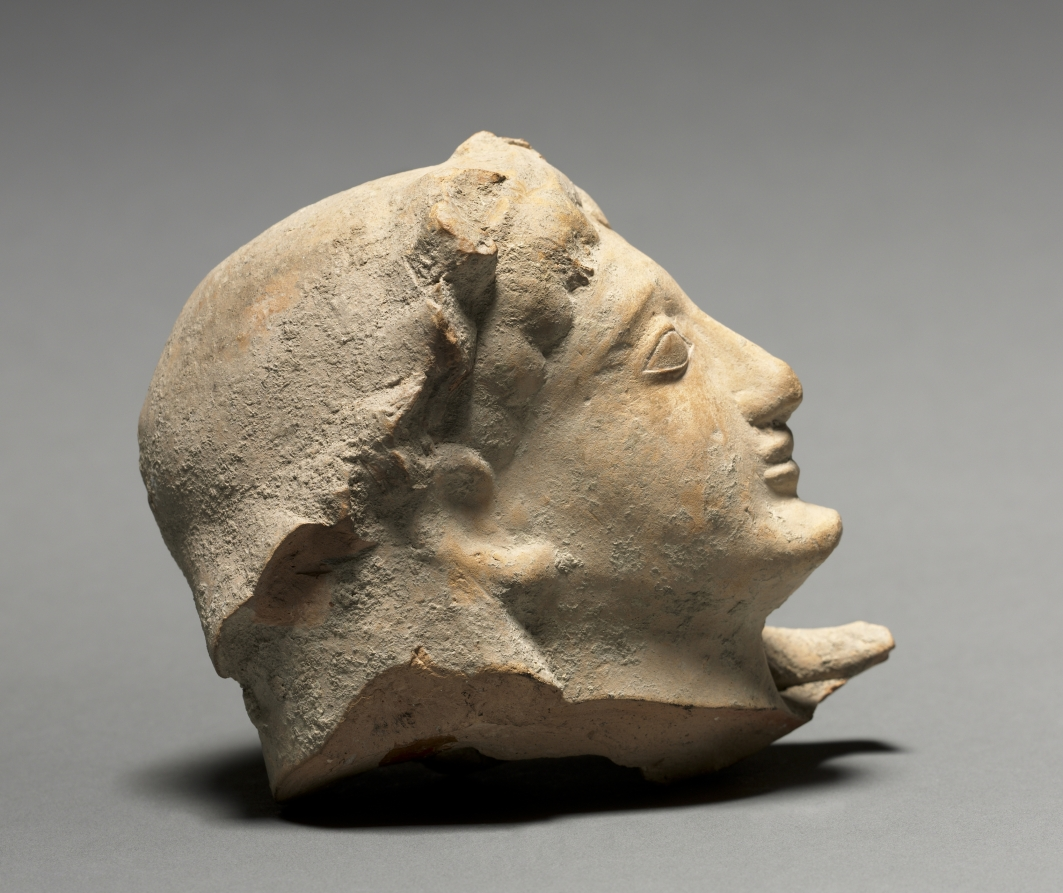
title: Head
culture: Greece, Sicily, Selinus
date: 525 BCE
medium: terracotta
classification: Sculpture